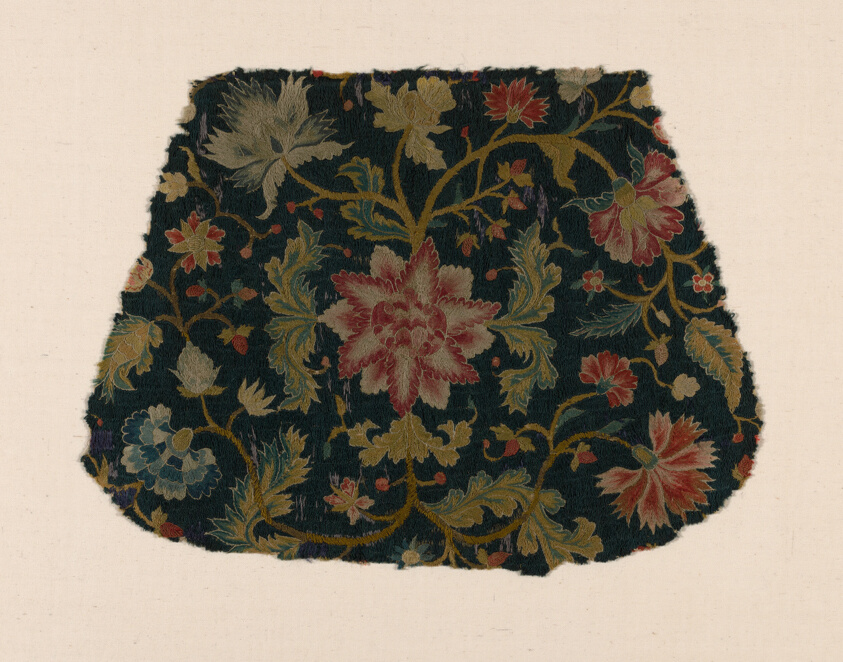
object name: Textile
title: Chair Seat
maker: Abigail Davenport Williams (American, 1696–1766); Probably Stamford, Connecticut, United States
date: c. 1717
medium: Linen, plain weave; embroidered with wool yarns in bullion, flat, Roman, satin, stem, and surface satin stitches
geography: Stamford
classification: textile; needlework (visual works)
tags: flowers, flora, floral motifs